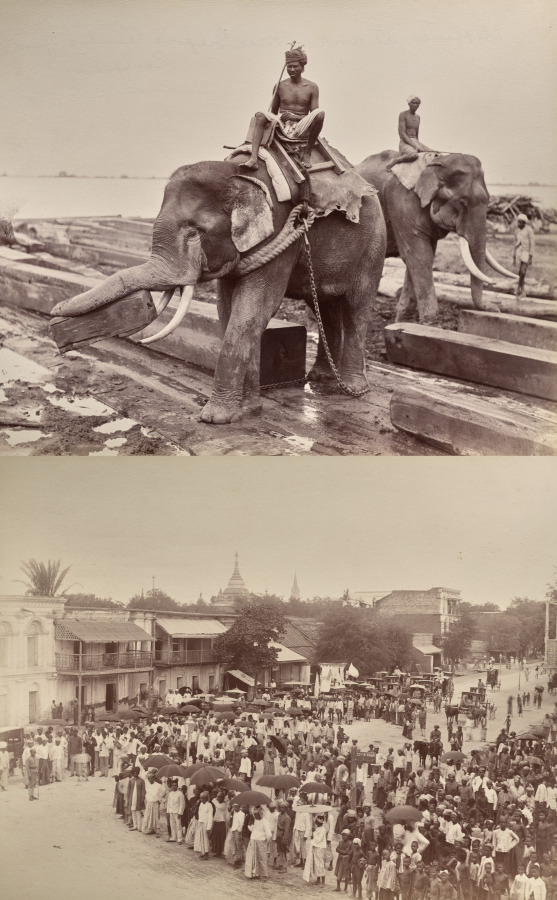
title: Untitled: (elephants moving blocks of wood, recto); (procession or crowd, verso)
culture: England, 19th century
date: 1870s-1880s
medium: Album page with two albumen prints mounted on both sides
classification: Photograph